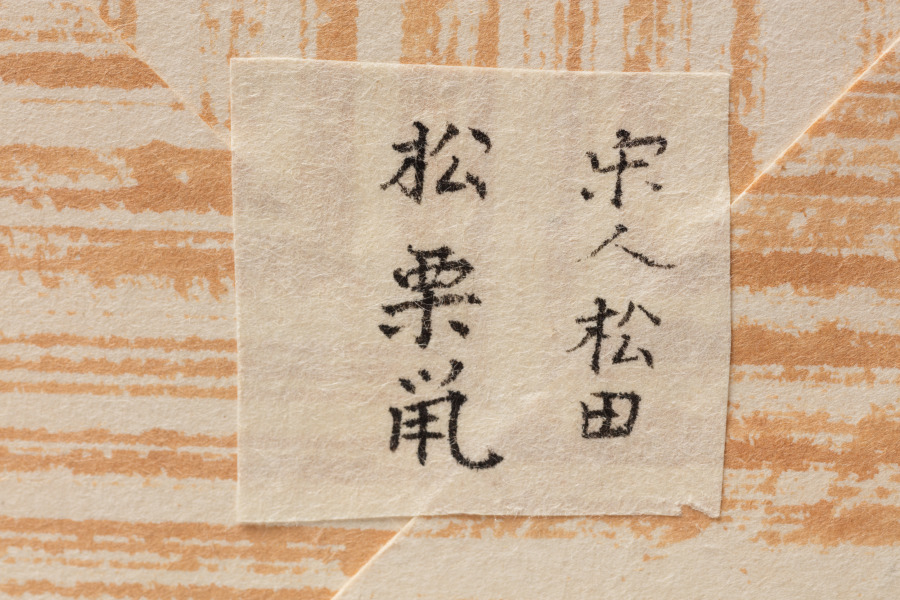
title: Squirrel on a Pine Branch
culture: China, Ming dynasty (1368–1644)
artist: Song Tian (Chinese, active 1300s)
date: 1500s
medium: hanging scroll, ink on paper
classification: Painting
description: This painting captures a squirrel in action, distracted and twisting its head while climbing and looking at a little bug to the right. The painter skillfully employs a combination of ink washes and fine brushstrokes to simulate the animal’s fur. Only three simple curved lines depict the squirrel’s claws. The subject of squirrels did not appear in Chinese painting before the late Southern Song (1127–1279) and Yuan periods (1279–1368). The painter Songtian was one of the few Yuan painters who specialized in this theme.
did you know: Although the evergreen pine does not indicate a time of year, the lively activity of the squirrel and the insect suggest a warm season.